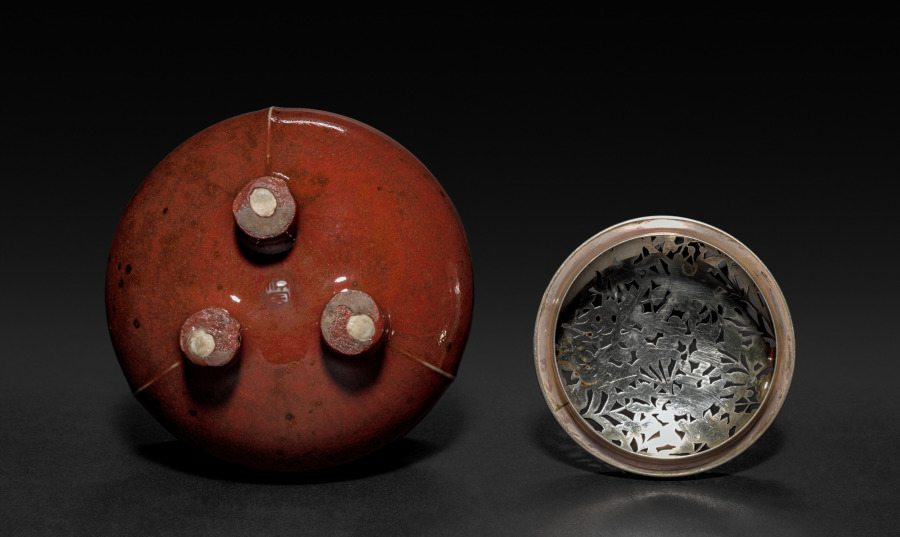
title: Incense Burner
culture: Japan, Meiji period (1868–1912)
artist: Seifū Yohei III (Japanese, 1851–1914)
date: 1893–97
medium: Porcelain with molded design, crimson glaze, and floral openwork silver lid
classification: Ceramic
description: Seifū Yohei III made incense burners in a wide variety of designs and styles. Their silver lids were produced outside the studio by metalwork specialists. This tripod incense burner has a distinctive red-colored glaze and linear molded decorations that run around the base of the collar and down the legs.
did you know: Seifū Yohei III’s incense burner with a variety of flowers on its lid has a glaze described as “crimson glaze” (kōyū); it is also dappled with dark spots of varied opacity and tiny pores throughout, which gives the container a rich, textured effect.